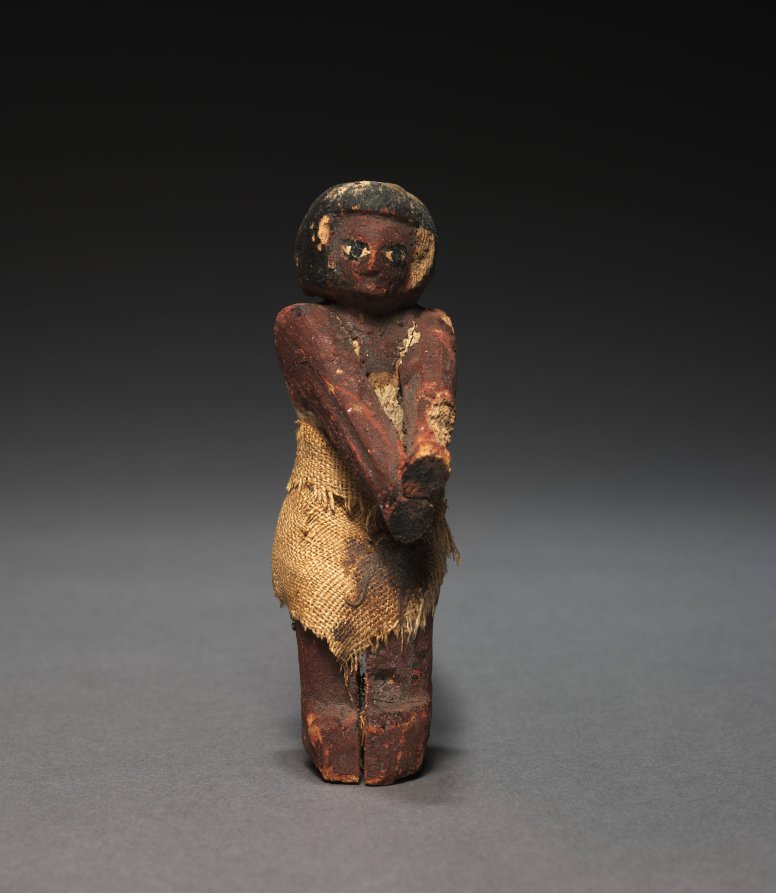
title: Seated Model Sailor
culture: Egypt, Middle Kingdom (2040–1648 BCE), Dynasties 11–12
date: c. 2000–1000 BCE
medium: painted sycamore fig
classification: Funerary Equipment